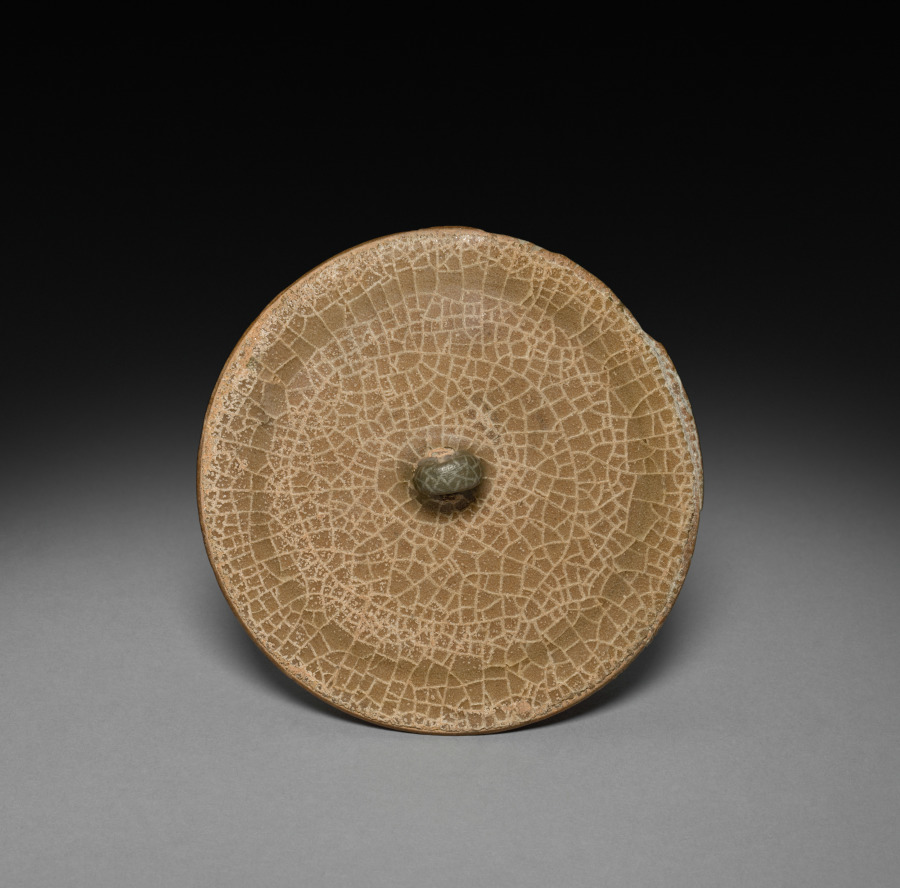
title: Covered Flat Jar (lid)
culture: China, Hangzhou, Suburban Altar Kiln, Southern Song dynasty (1127-1279)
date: 1127–1279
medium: glazed buff stoneware, Guan ware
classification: Ceramic